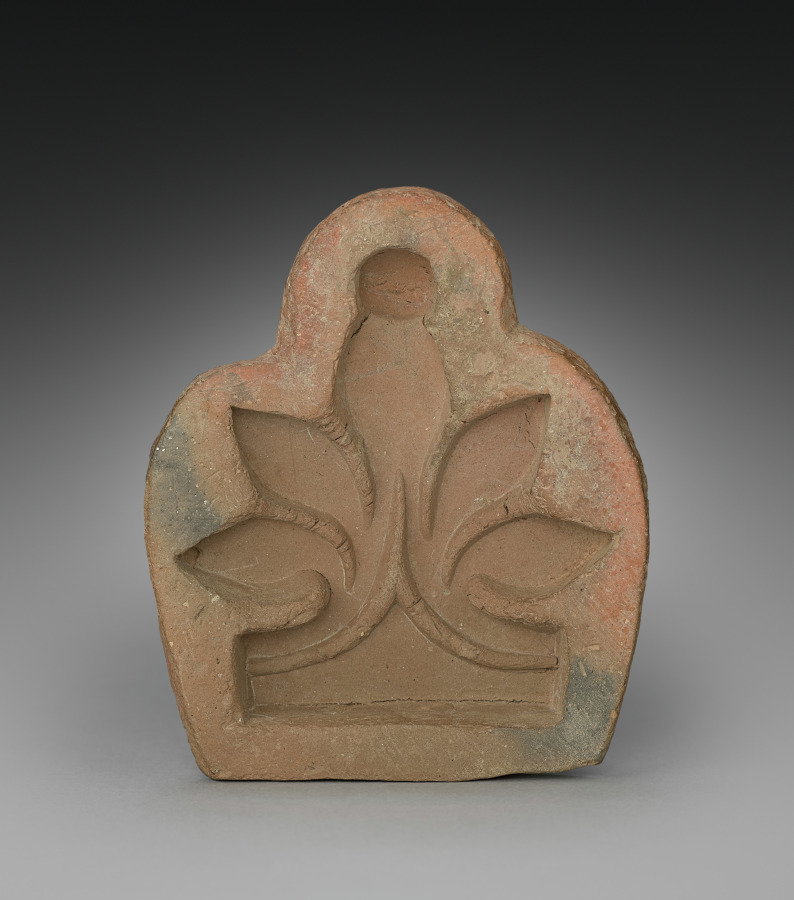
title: Mould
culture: India, Kashmir, 8th-9th Century (?)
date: 700s-800s(?)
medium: terracotta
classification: Ceramic